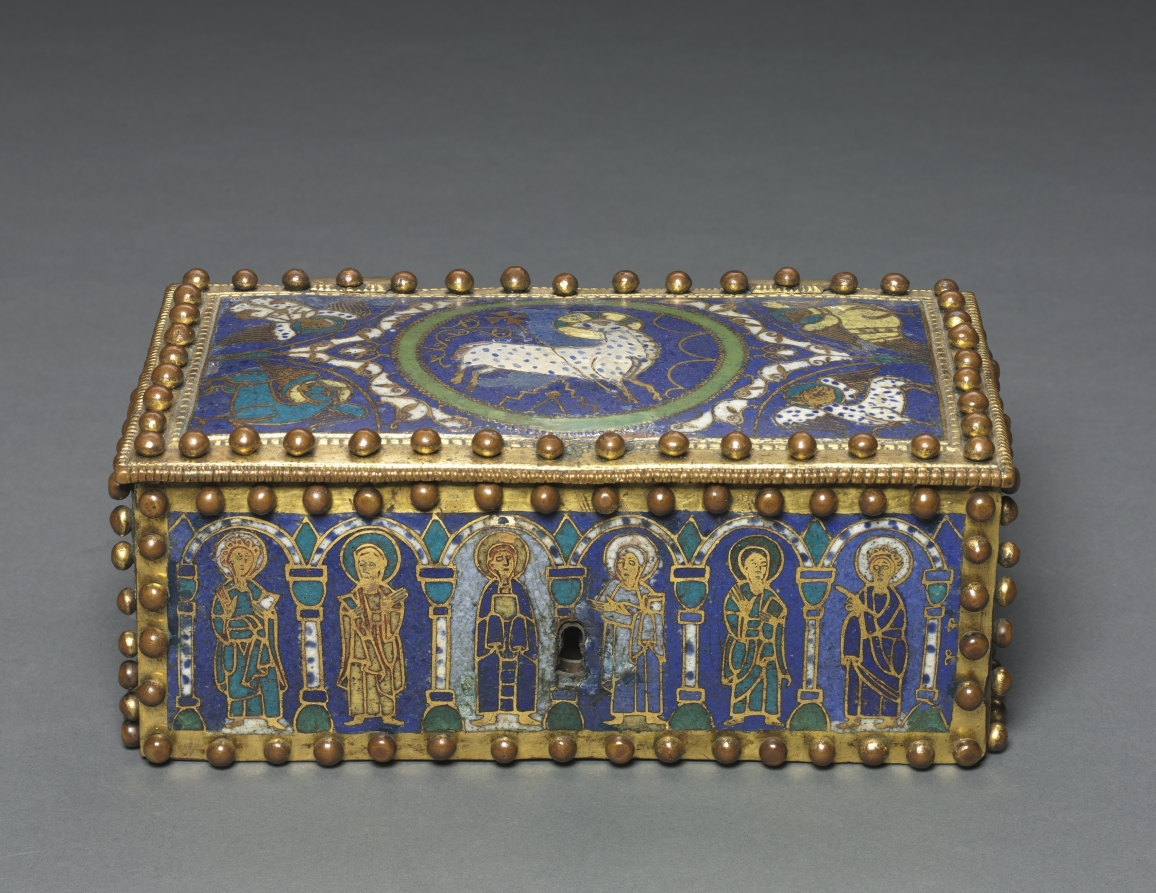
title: Casket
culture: Northern Germany?, Romanesque period, 12th century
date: 1100–1150?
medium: gilded copper, champlevé enamel, wood core (modern)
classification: Enamel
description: This champlevé enamel casket belongs to a distinct group of nine closely related objects characterized by the vivid colors of their enamel decoration and rows of spherical pins placed along the edges of each enamel plaque. Recent X-ray analysis suggests that the casket originally functioned as a stand for an altar cross. Such a function is attested to in at least three related caskets (in Copenhagen, Hildesheim, and Berlin). The casket’s iconographic program features the 12 apostles, placed under arcades (on the long sides), the Crucifixion and Christ in Majesty (on the short sides), and the Lamb of God surrounded by the symbols of the four Evangelists (on the lid).